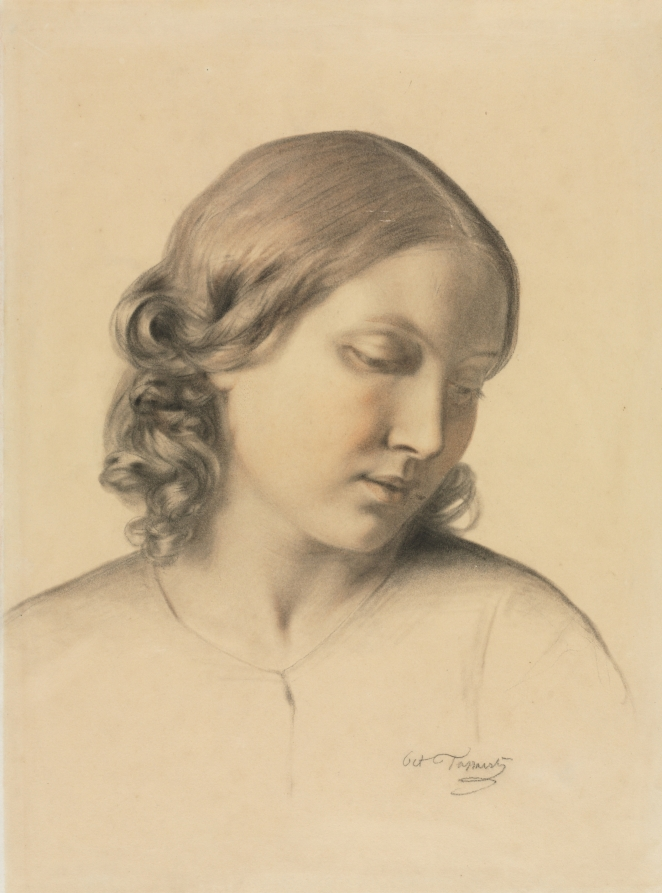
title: Portrait of a Young Woman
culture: France, 19th century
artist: Octave Tassaert (French, 1800–1874)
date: c. 1854–1858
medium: black chalk with touches of colored chalk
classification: Drawing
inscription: inscribed in black chalk, lower right: "Oct Tassaert"